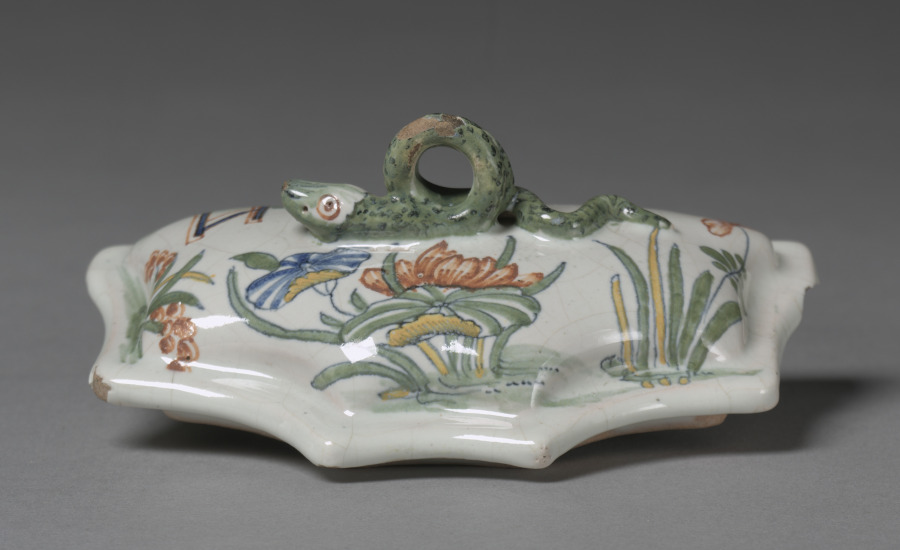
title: Lid from Writing Stand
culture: France, Sinceny, 18th century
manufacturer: Sinceny Factory (French)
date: 1746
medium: Tin-glazed earthenware (faience) with enamel decoration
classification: Ceramic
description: The faience factory at Sinceny was an offshoot of that at Rouen. In style, Sinceny closely resembles later Rouen wares with polychrome decoration. The stylized flowers and insects which decorate this writing stand are entirely typical of Sinceny faience.